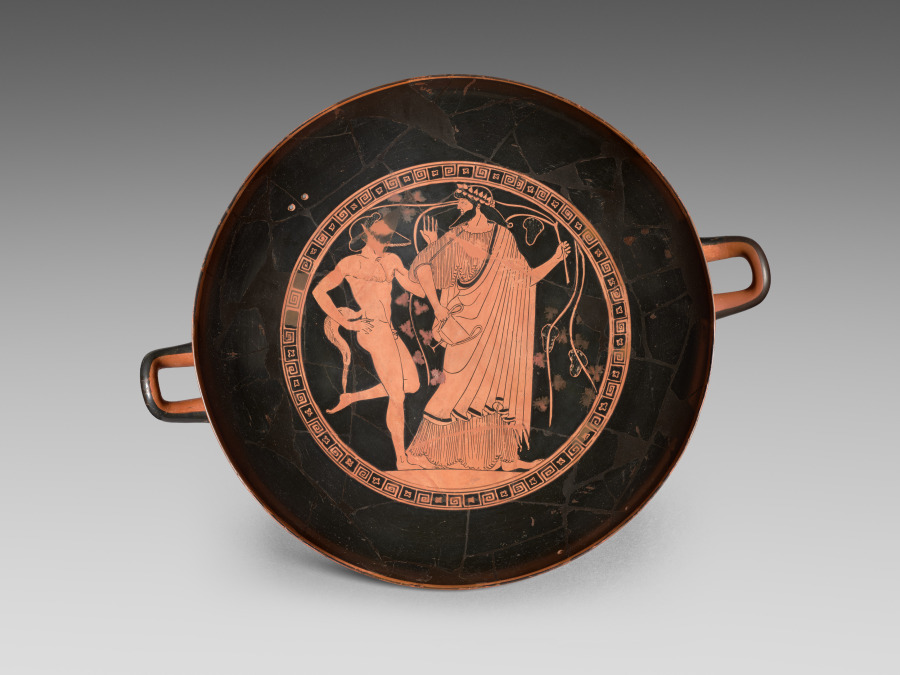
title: Red-Figure Kylix (Drinking Cup): Dionysos and Satyr (I); Satyrs and Maenads (A, B)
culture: Greece, Athens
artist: attributed to Douris (Greek, Attic, active c. 500–470 BCE)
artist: or Painter of London E 55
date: c. 480 BCE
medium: ceramic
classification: Ceramic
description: Reconstructed from 72 fragments, this cup has been repaired several times, indicating its enduring value to owners. Pairs of holes straddling cracks once held ancient wire or clamp repairs. Numerous incomplete holes may signify recent interventions. Early modern efforts to hide cracks and certain features of the satyrs that could have offended sensibilities of the time also masked the original artistry of its painting. So, for many years the cup languished in storage. Cleaning and reconstruction in 1952–53 revealed enough to allow attribution to a respected vase painter, Douris, reviving the cup’s reputation. More recently, a different attribution has been suggested, and a new conservation campaign replaced ancient parts from a different cup with modern reconstructions more like those lost.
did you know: In the tondo, a dancing satyr approaches the wine god Dionysos, who holds a kantharos and grapevine.